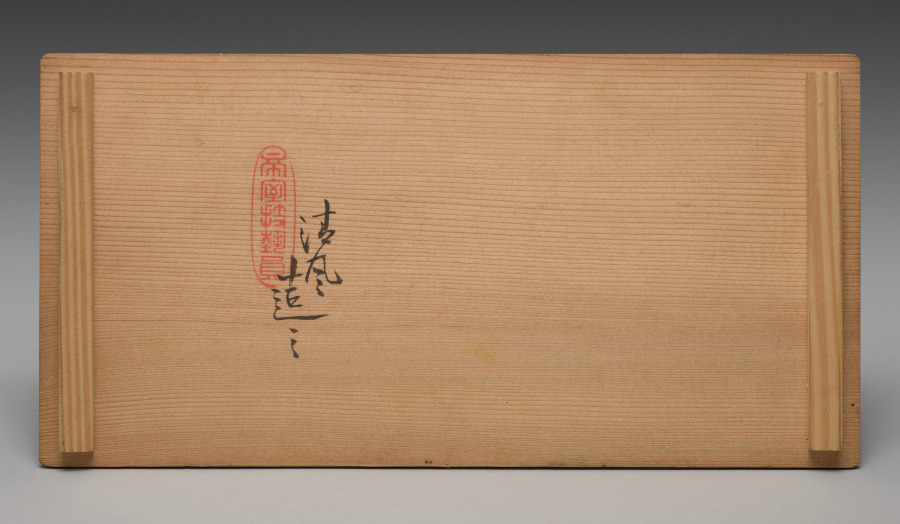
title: Snow-Flake Side Dishes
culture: Japan, Meiji period (1868–1912)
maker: Seifū Yohei III (Japanese, 1851–1914)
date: 1893–1914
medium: Set of six dishes; porcelain with lobed rims and pink glaze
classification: Ceramic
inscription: 清風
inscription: 帝室技芸員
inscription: 清風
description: According to the box lid, this set of 6 side dishes, or mukōzuke, are “snow-flower style” (sekkashiki), having mouths shaped like snowflakes. Their mouths, which have 6 lobes and scalloped edges, are traced with brown iron oxide at the rim. The outside of each bowl is glazed with a very bright pink over the basin and foot, and the inside is left white. From directly above, one sees a snowflake-like shape, and from the side, they seem to float above a rosy ground.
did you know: The box for this set of dishes has an inscription on the side noting that they were for a person with the family name Nakamoto.